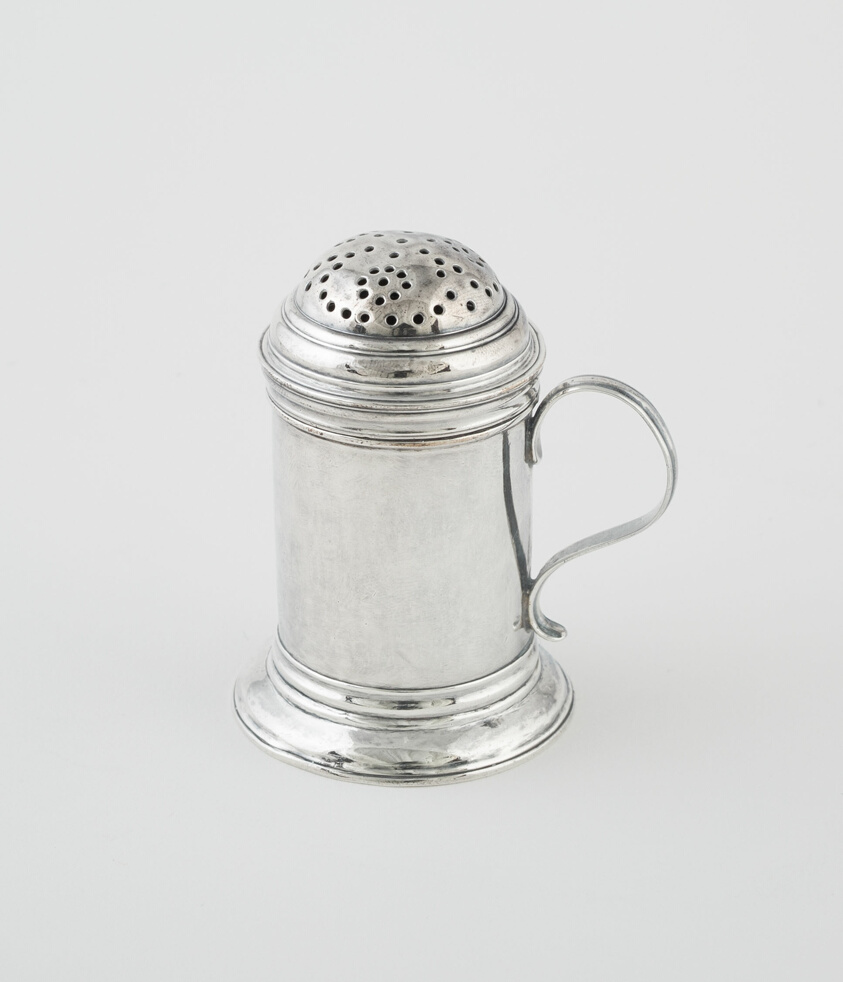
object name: Metalwork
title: Pepper Caster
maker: William Fordham; English, active 1725; London, England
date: 1731/32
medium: Silver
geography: London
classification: silver; metalwork; european decorative arts